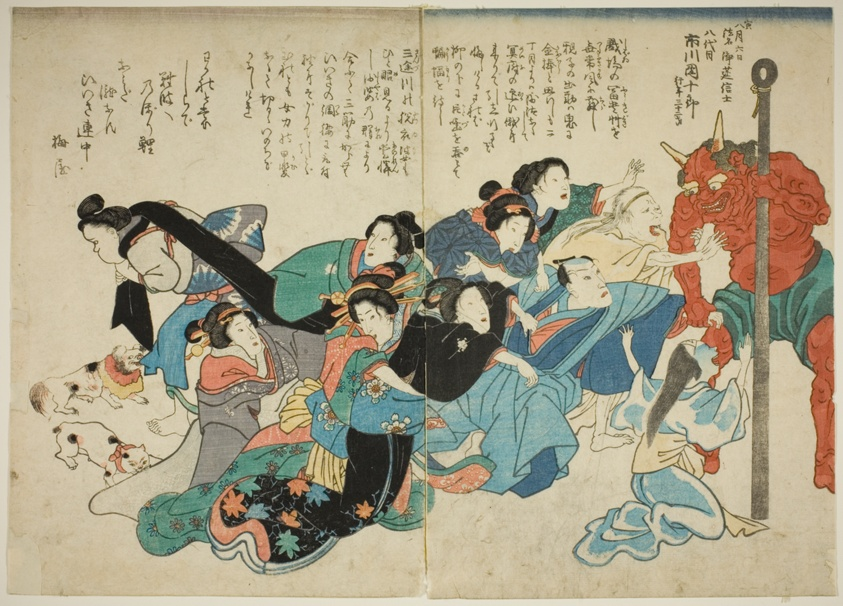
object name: Print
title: The Death of Ichikawa Danjuro VIII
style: Japanese (culture or style)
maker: Unknown Artist; Japanese, active 19th century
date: 1854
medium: Color woodblock print; oban diptych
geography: Japan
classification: print; asian art